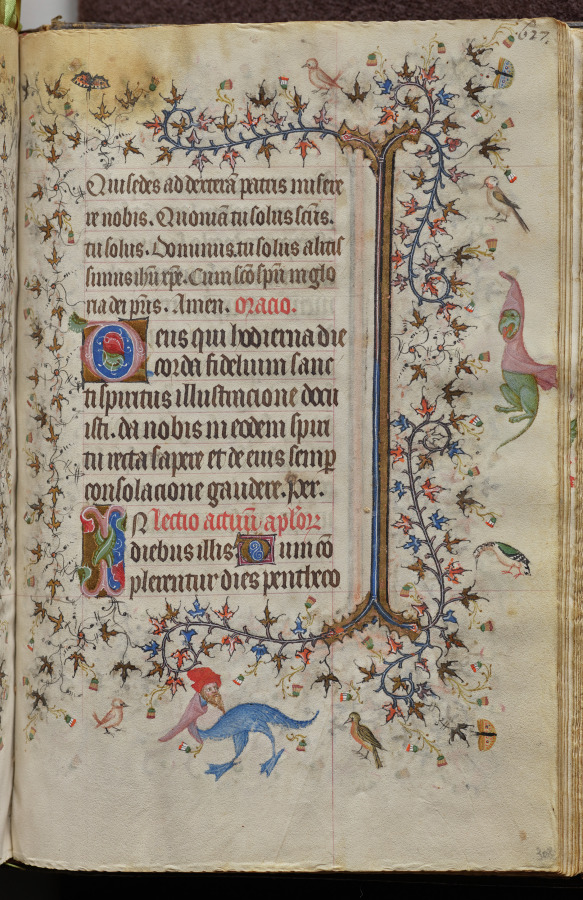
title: Hours of Charles the Noble, King of Navarre (1361-1425): fol. 308r, Text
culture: France, Paris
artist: Master of the Brussels Initials and Associates (French)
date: c. 1405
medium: ink, tempera, and gold on vellum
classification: Bound Volume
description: This precious volume was obviously highly prized by its owner, the French-born King of Navarre, who had his coat of arms painted on no less than twenty folios. Rather than directly commissioning this manuscript from a specific workshop, it seems that Charles the Noble acquired his book of hours -- perhaps ready-made for the luxury market -- while on a trip to Paris in 1404-05. A collaborative effort, six painting styles are evidenced within the pages of this codex, those of two Italians, two Frenchmen, and two Netherlanders. The painter who was responsible for the planning and decoration of the book, and who produced seventeen of the large miniatures, was a Bolognese artist known as the Master of the Brussels Initials. His principal assistant, responsible for most of the borders, was a Florentine who signed his name "Zecho" da Firenze on folio 208 verso.